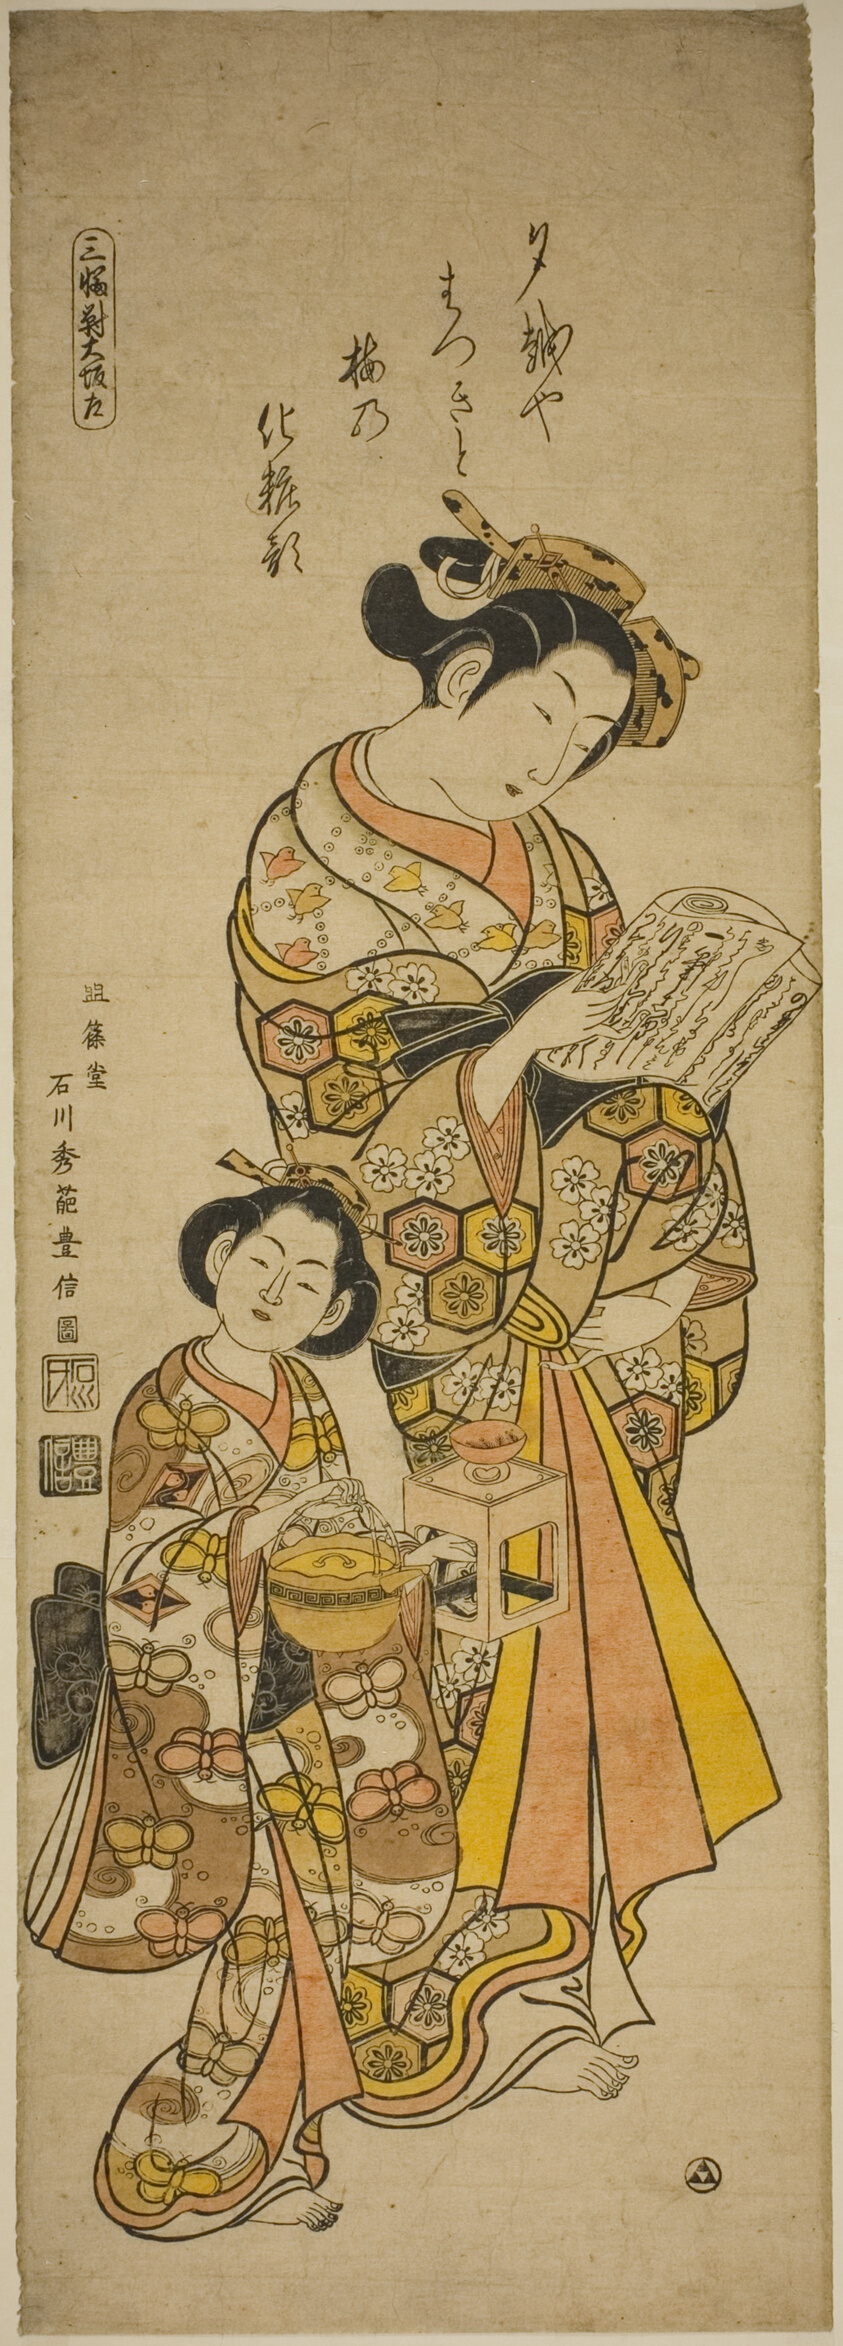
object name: Print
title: Courtesan of Osaka and Her Attendant, left sheet of a triptych of beauties of the three capitals (Sanpukutsui Osaka hidari)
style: Japanese (culture or style)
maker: Ishikawa Toyonobu (Japanese, 1711-1785)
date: c. 1745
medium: Hand-colored woodblock print; wide hashira-e, beni-e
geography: Japan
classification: woodblock print; print; asian art